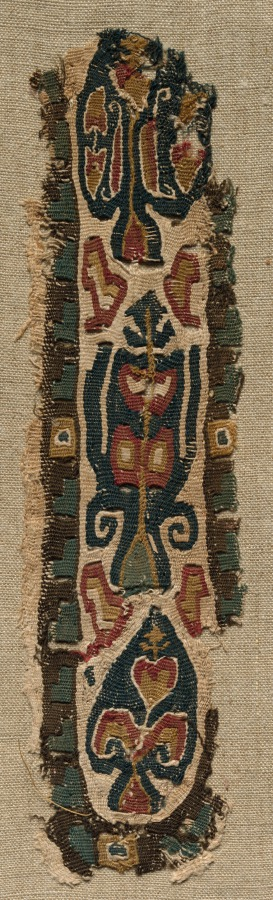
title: Fragment of a Clavus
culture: Egypt, late Abbasid or Tulunid period, 9th century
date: 800s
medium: tapestry weave; wool and linen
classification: Textile